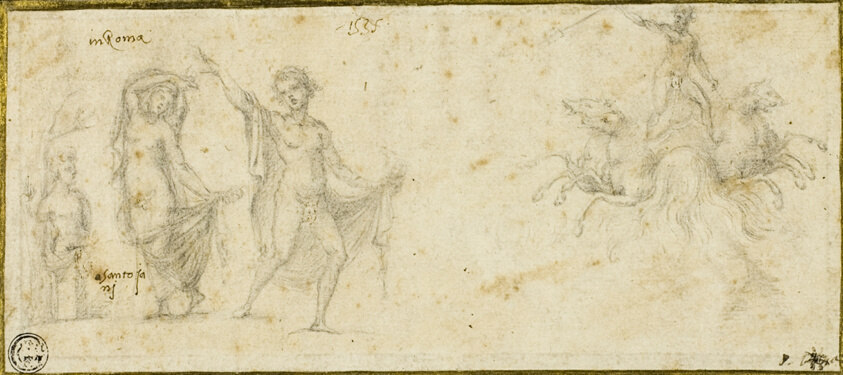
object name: Drawing and Watercolor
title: Sketches after the Antique: Bacchic Revels; Neptune in His Chariot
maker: Pirro Ligorio (Italian, c. 1513-1583)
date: c. 1535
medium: Black chalk, with pen and brown ink, on ivory laid paper, laid down on cream laid paper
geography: Italy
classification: chalk with ink; drawings (visual works); prints and drawing